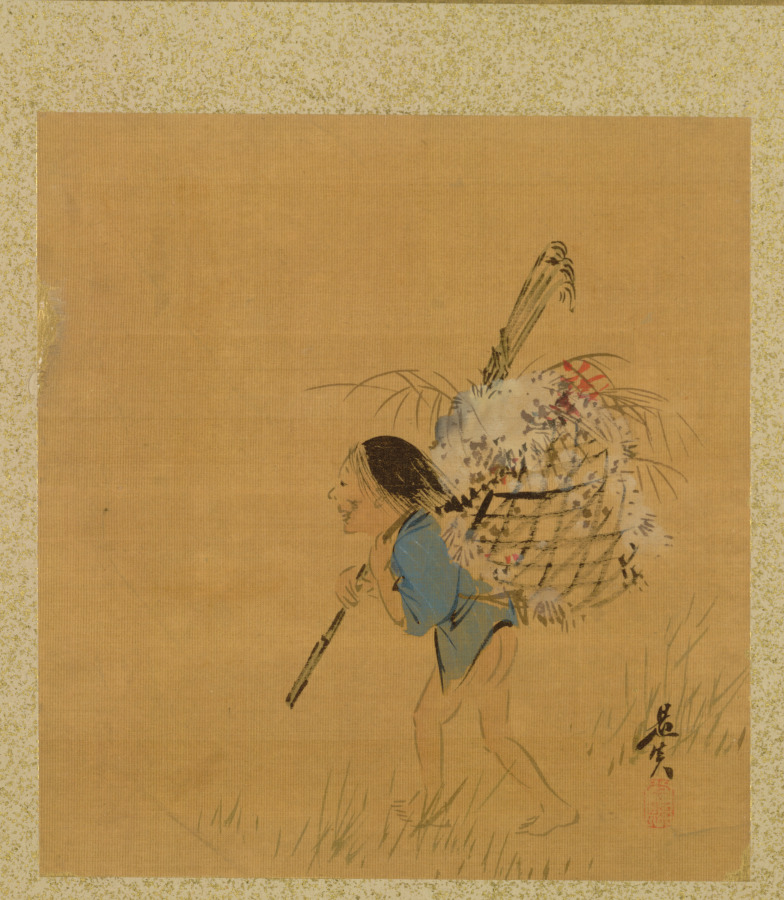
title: Peasant with Basket from Album of Paintings by the Venerable Zeshin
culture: Japan, Edo period (1615–1868)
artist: Shibata Zeshin (Japanese, 1807–1891)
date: 1847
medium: leaf in accordion-style album; ink, color, and gold on silk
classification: Bound Volume